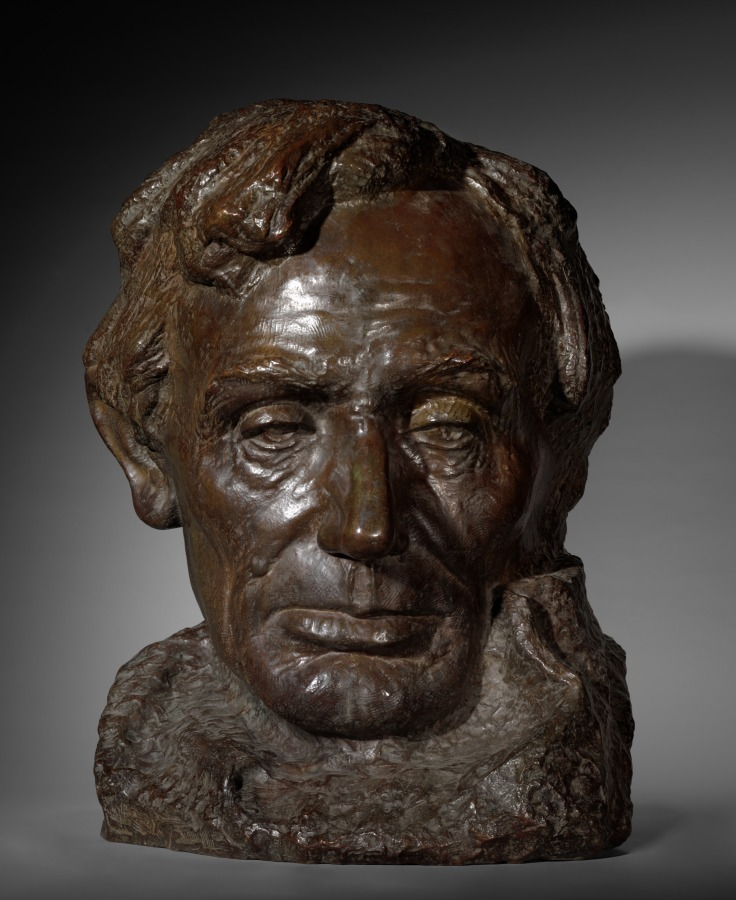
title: Head of Lincoln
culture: America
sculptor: Gutzon Borglum (American, 1867–1941)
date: 1908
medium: bronze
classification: Sculpture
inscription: Signed and dated on left of base: "Gutzon Borglum, 1908"